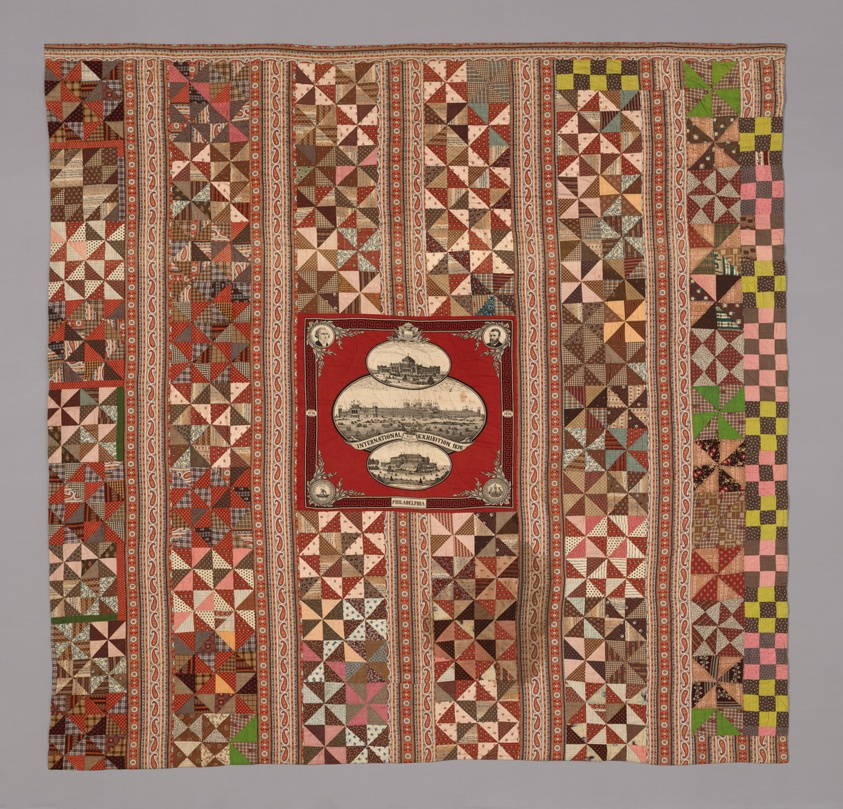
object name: Textile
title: Philadelphia Centennial Exhibition Quilt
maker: United States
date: 1876/1900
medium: Pieced quilt; dyed and printed cotton and wool plain and patterned weave fabrics; printed cotton handkerchief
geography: United States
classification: needlework - quilt; textile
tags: commemoration, propaganda, pennsylvania, exhibitions, geometric, checkerboards, paisley, triangles, presidents, united states of america, medallions, buildings